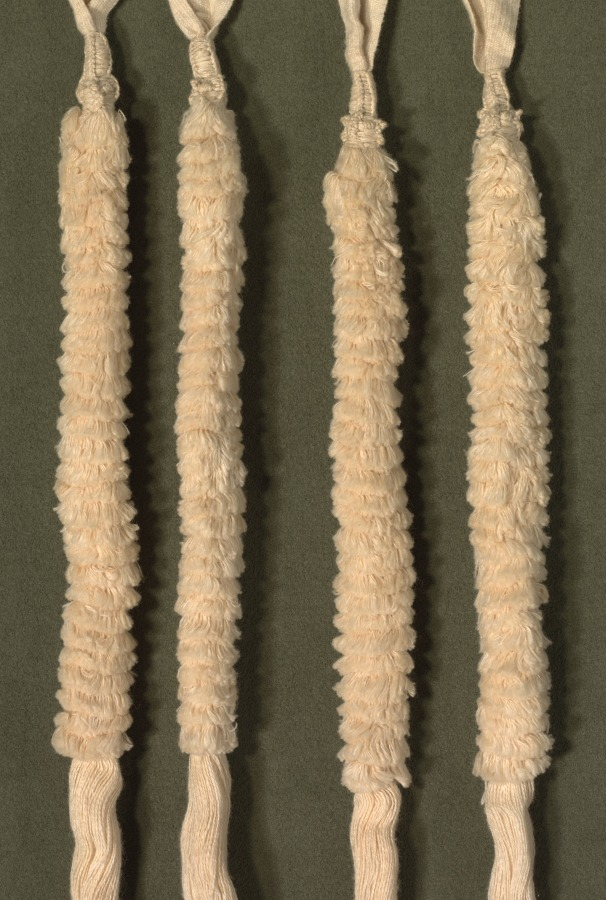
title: Band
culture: Peru, Chimú or Chimú-Inka, 12th-16th century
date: 1100–1532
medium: white cotton; plain weave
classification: Textile